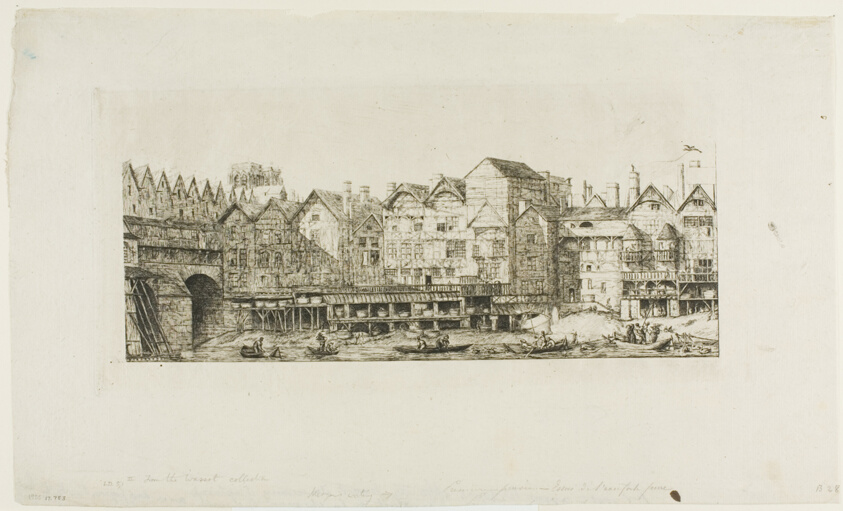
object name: Print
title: View of Part of the City of Paris toward the Close of the XVII Century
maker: Charles Meryon (French, 1821-1868)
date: 1861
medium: Etching on ivory laid paper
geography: France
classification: etching; print; prints and drawing